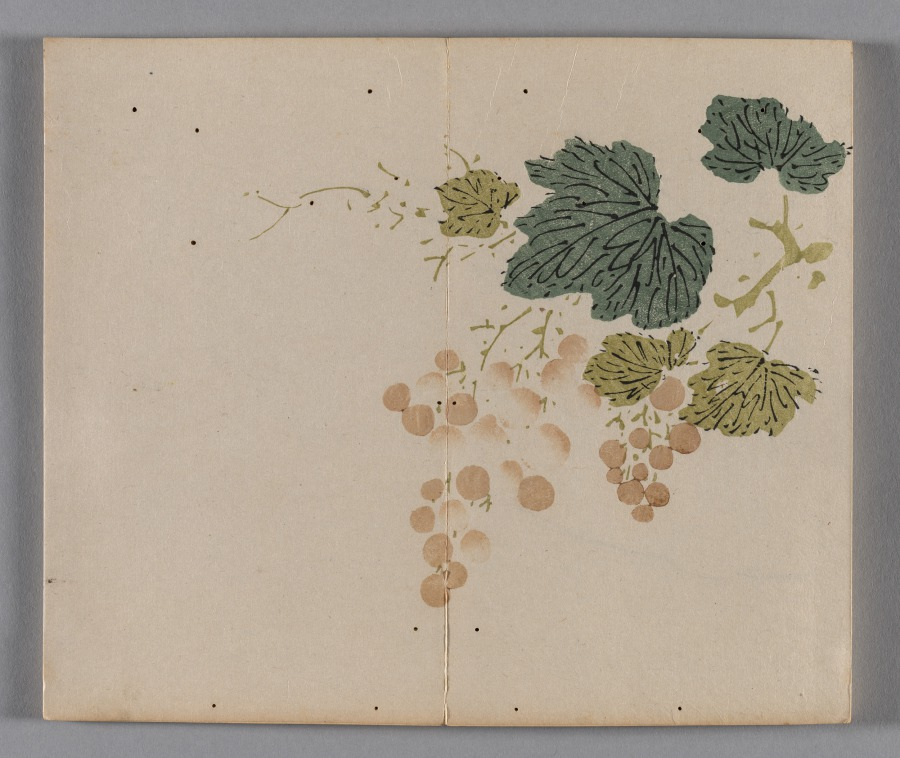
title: Ten Bamboo Studio Painting and Calligraphy Handbook (Shizhuzhai shuhua pu): Fruit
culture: China, Qing dynasty (1644-1911)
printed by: Hu Zhengyan (Chinese, c. 1584–1674)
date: 1633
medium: Woodblock-printed book; ink and colors on paper; first edition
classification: Print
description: Color printing reached a level of perfection in the early 1600s, as seen in this Ten Bamboo Studio Collection of Calligraphy and Painting and the Mustard Seed Garden Manual of Painting (printed 1679 and 1701). The painterly quality, precision in registering (aligning) the woodblocks, and harmonious colors made them the most successful color print editions in Chinese history. Both editions were printed and compiled in Nanjing, spread nationwide, and had a great impact on the arts in Japan and Korea.